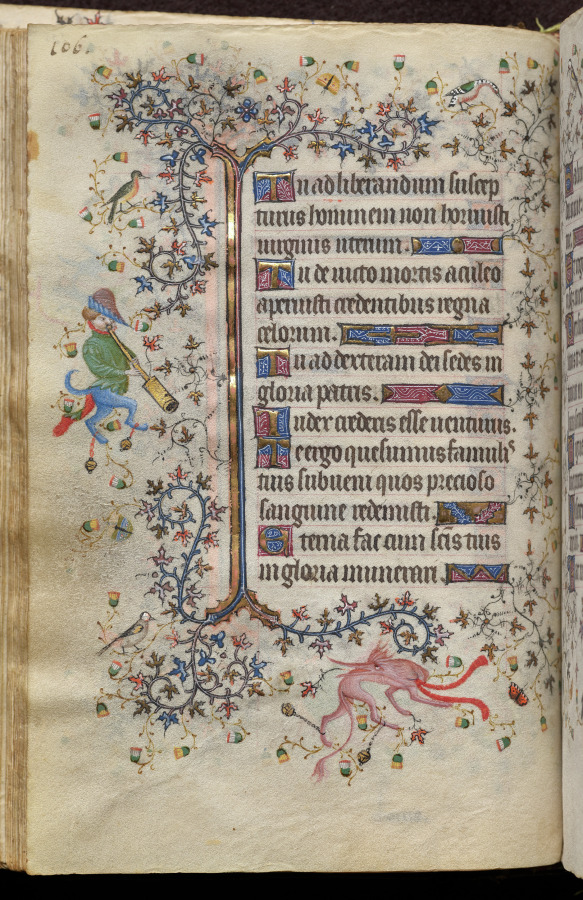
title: Hours of Charles the Noble, King of Navarre (1361-1425): fol. 53v, Text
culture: France, Paris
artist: Master of the Brussels Initials and Associates (French)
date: c. 1405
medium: ink, tempera, and gold on vellum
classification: Bound Volume